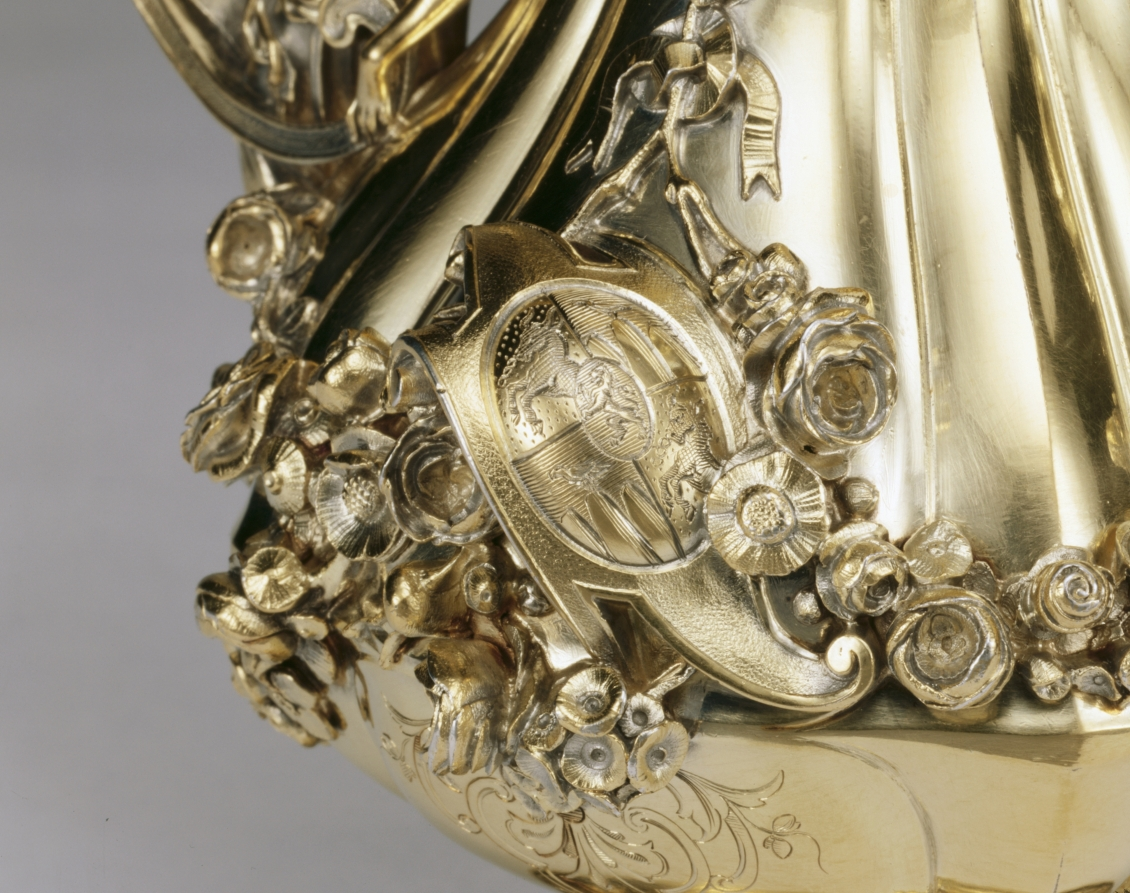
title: Covered Jug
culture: France, 19th century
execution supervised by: Jean-Valentin Morel (French, 1794–1860)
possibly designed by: Jules Dieterle (French, 1811–1889)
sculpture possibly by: Jules Klagmann (French, 1810–1867)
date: c. 1845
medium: gilded silver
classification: Silver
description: The elegance and richness of this ewer demonstrate the high level of technical mastery achieved by its maker. Morel studied under his father, a Parisian lapidary (someone who cuts, polishes, and engraves hard stones), and with Adrien Vachette, a maker of gold boxes. In 1842 he went into partnership with Charles-Edmond Duponchel, which lasted until the late 1840s, at which time he established himself in London, remaining there until 1852, when he returned to Paris. Morel frequentlyfollowed the designs of others, and it has been suggested that in the case of this pitcher his well-known contemporary, Jules Dieterle (1811-1889), may have conceived the overall form. The female figure seems to have been based on a design by the sculptor Jules Klagmann (1810-1867).